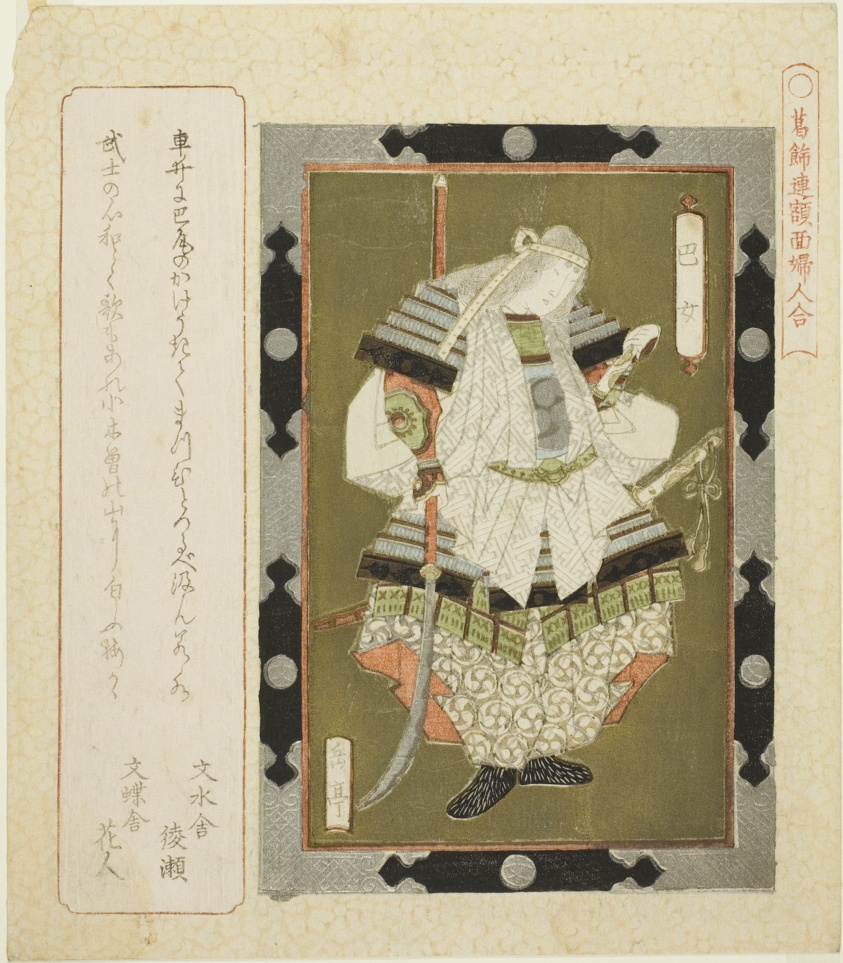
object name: Print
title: Lady Tomoe (Tomoe jo), from the series "Framed Pictures of Women for the Katsushika Circle (Katsushikaren gakumen fujin awase)"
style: Japanese (culture or style)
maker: Yashima Gakutei (Japanese, 1786 (?)-1868)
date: c. 1822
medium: Color woodblock print; shikishiban, surimono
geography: Japan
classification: woodblock print; print; asian art